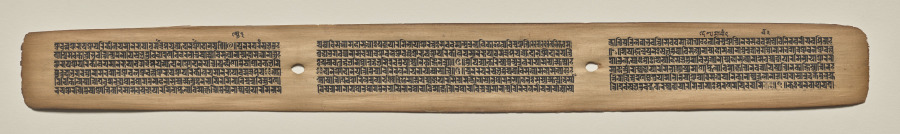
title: Text, folio 159 (recto), from a Manuscript of the Perfection of Wisdom in Eight Thousand Lines (Ashtasahasrika Prajnaparamita-sutra)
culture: Eastern India, Bihar, Vikramashila Monastery. Painting: Nepal, Kathmandu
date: Sunday, September 14, 1119 (year 239 of the Newar Samvat in the month of Ashvina)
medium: gum tempera and ink on palm leaves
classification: Painting